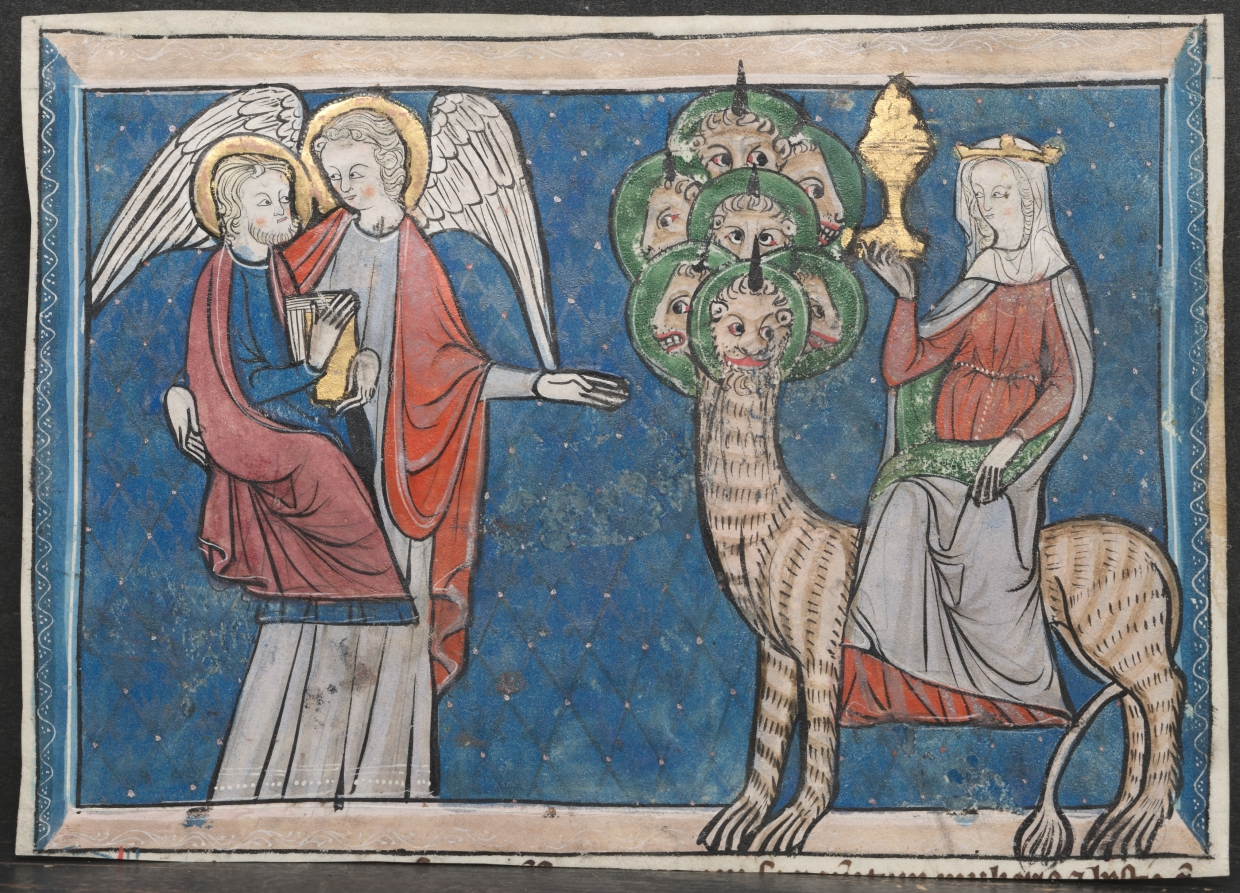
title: Miniature from a Manuscript of the Apocalypse: The Woman upon the Scarlet Beast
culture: France, Lorraine, 13th century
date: c. 1295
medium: ink, tempera, and gold on vellum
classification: Manuscript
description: The visionary text of Saint John the Evangelist's Apocalypse, the final book of the New Testament, inspired these images of salvation, sin, and divine retribution. A large number of illustrated volumes of the Apocalypse appeared in Northern Europe, especially in England, after the year 1240-perhaps reflecting a fear of the world's end. These miniatures come from a manuscript produced in Lorraine, then artistically influenced by English models.